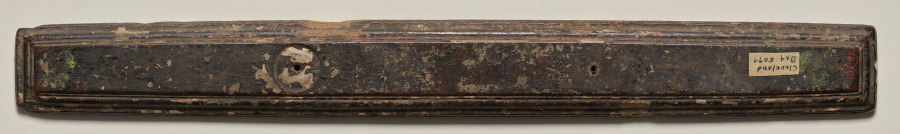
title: Bottom cover, from a Manuscript of the Perfection of Wisdom in Eight Thousand Lines (Ashtasahasrika Prajnaparamita-sutra)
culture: Eastern India, Bihar, Vikramashila Monastery. Painting: Nepal, Kathmandu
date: Sunday, September 14, 1119 (year 239 of the Newar Samvat in the month of Ashvina)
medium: Gum tempera, paper, and colors on wood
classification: Painting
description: Palm-leaf manuscripts in the pothi format are recognizable by their long and horizontal shapes. In contrast to Western-style books that require one to turn the pages left-to-right or right-to-left, pothi are read by flipping the pages with a vertical motion. The palm-leaf pages would have been bound together by a cord attached to a peg that was run through the two binding holes on the top and bottom covers. The spot for the peg is still visible on the left side of this cover. When not in use, the manuscript would have been wrapped in ribbons and textiles that protected it from dust, moisture, and pests.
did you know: Wooden covers helped to protect the fragile palm-leaf pages and keep the leaves compact.